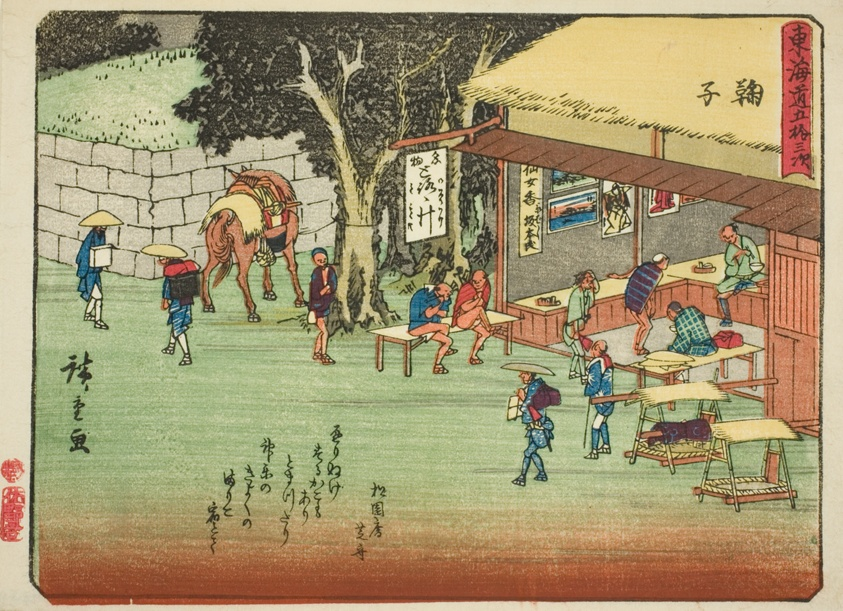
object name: Print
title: Mariko, from the series "Fifty-three Stations of the Tokaido (Tokaido gojusan tsugi)," also known as the Tokaido with Poem (Kyoka iri Tokaido)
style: Japanese (culture or style)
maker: Utagawa Hiroshige 歌川 広重; Japanese, 1797-1858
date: c. 1837/42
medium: Color woodblock print; chuban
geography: Japan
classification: woodblock print; print; asian art